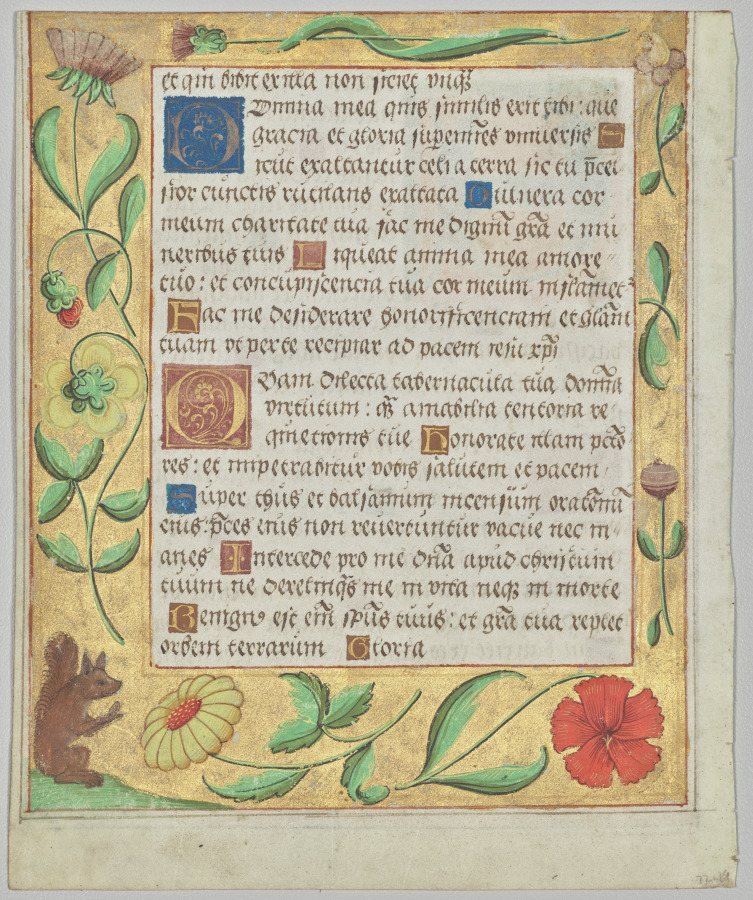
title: Leaf from a Psalter and Prayerbook: Ornamental Border with Flowers and Squirrel (verso)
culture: North Germany, Hildesheim (?), 16th century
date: c. 1524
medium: ink, tempera and liquid gold on vellum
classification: Manuscript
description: This leaf and the one nearby were excised from the same prayer book. They reveal the favored secular motifs that include decorations with animals, peasants, and domestic activities such as cooking. Here a woman is shown kneading bread. A composite text combining features of a psalter, a collection of psalms or religious verses, and a prayer book, it was used during Mass and other services. The original book was a highly personalized volume written and illuminated in or around the city of Hildesheim in Northern Germany, as suggested by the prominent inclusion of Saint Godehard, Bishop of Hildesheim (died 1038), in the calendar (not shown).